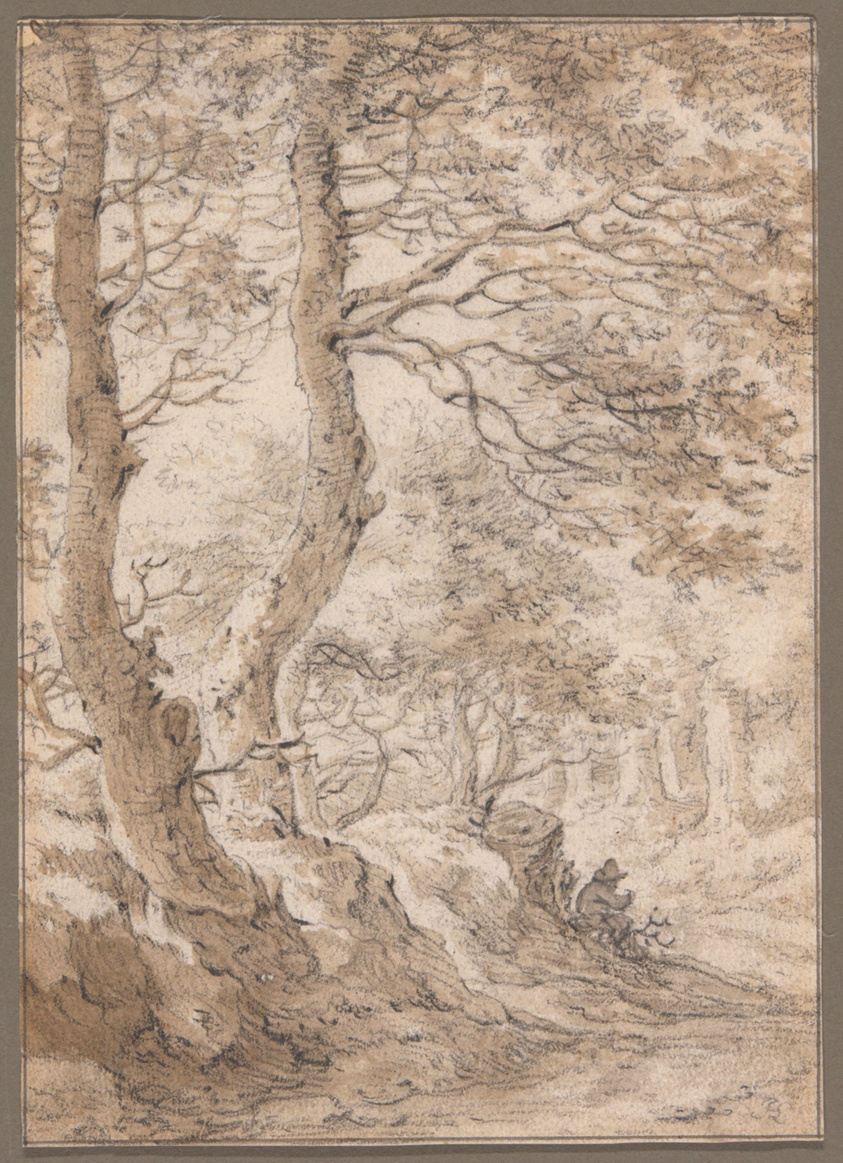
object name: Drawing and Watercolor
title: A Forest Interior, with a Seated Figure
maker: Herman Saftleven (Dutch, 1609-1685)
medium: Black chalk and brush and brown wash, with touches of black crayon and traces of opaque white watercolor, ruled in pen and black ink at edges, on ivory laid paper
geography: Netherlands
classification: chalk; paper; prints and drawing